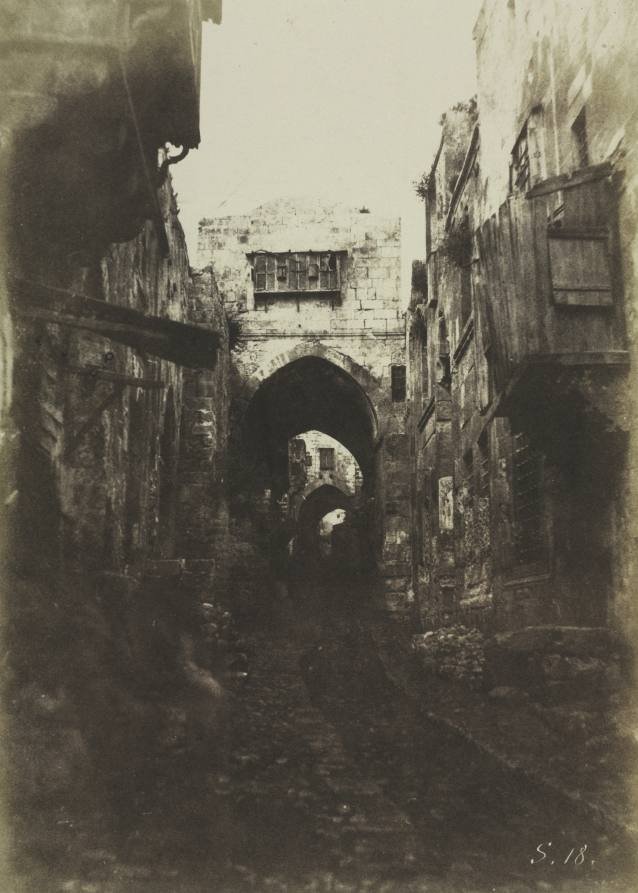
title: Street in the Arab Quarter, Jerusalem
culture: France, 19th century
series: Jérusalem - Étude et reproduction photographique des monuments de la ville sainte depuis l'époque Judaïque jusqu'a nos jours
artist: Auguste Salzmann (French, 1824–1872)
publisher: Gide et J. Baudry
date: 1854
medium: salted paper print, Blanquart-Évrard process, from waxed paper negative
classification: Photograph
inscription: Written on negative: "S.18"; in pencil on verso: "X-C"